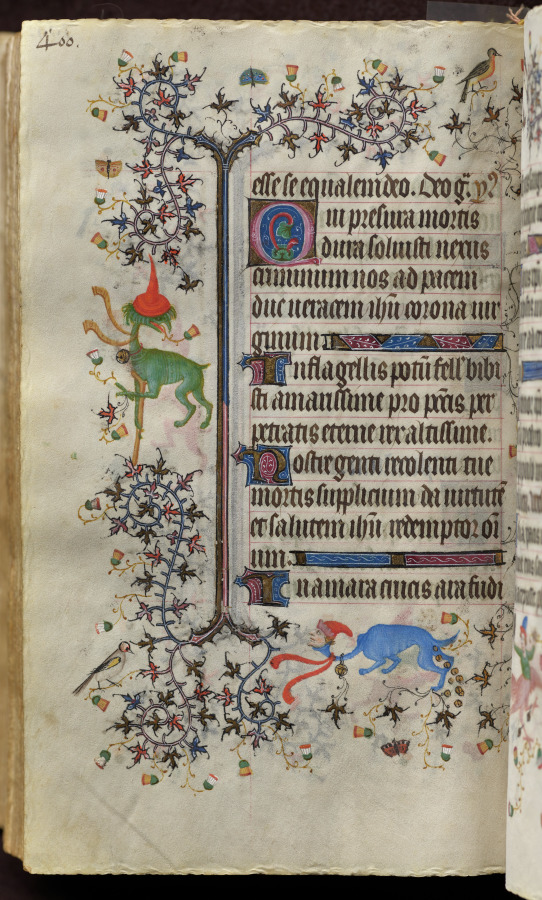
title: Hours of Charles the Noble, King of Navarre (1361-1425): fol. 194v, Text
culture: France, Paris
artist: Master of the Brussels Initials and Associates (French)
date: c. 1405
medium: ink, tempera, and gold on vellum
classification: Bound Volume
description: This precious volume was obviously highly prized by its owner, the French-born King of Navarre, who had his coat of arms painted on no less than twenty folios. Rather than directly commissioning this manuscript from a specific workshop, it seems that Charles the Noble acquired his book of hours -- perhaps ready-made for the luxury market -- while on a trip to Paris in 1404-05. A collaborative effort, six painting styles are evidenced within the pages of this codex, those of two Italians, two Frenchmen, and two Netherlanders. The painter who was responsible for the planning and decoration of the book, and who produced seventeen of the large miniatures, was a Bolognese artist known as the Master of the Brussels Initials. His principal assistant, responsible for most of the borders, was a Florentine who signed his name "Zecho" da Firenze on folio 208 verso.